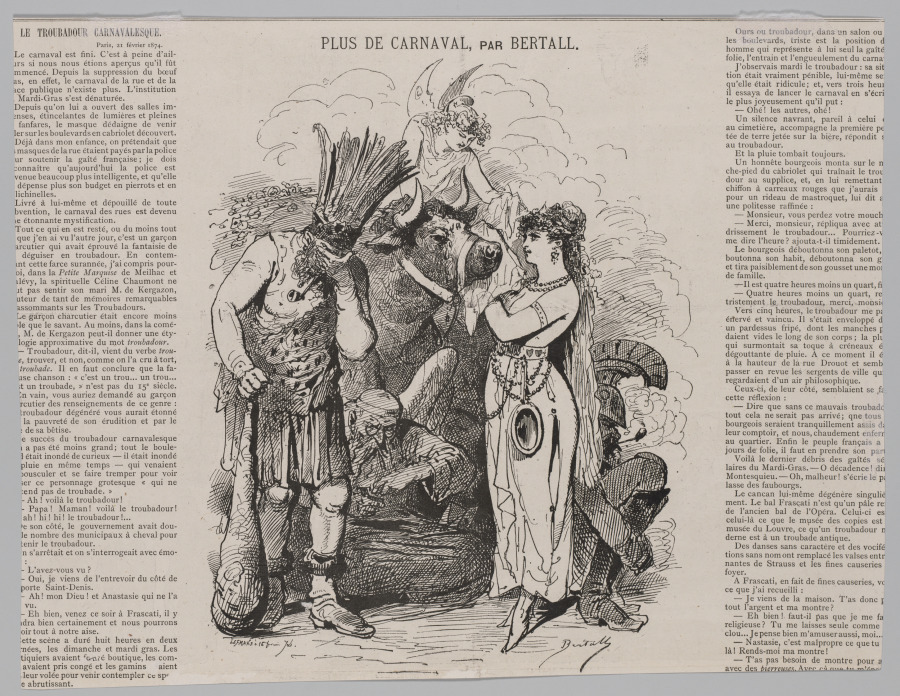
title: At the Café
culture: France, 19th century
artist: Édouard Manet (French, 1832–1883)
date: 1874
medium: gillotage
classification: Print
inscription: signed, in plate, at lower right: Manet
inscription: on recto, at lower left: fragment of an unidentified blind stamp (HN within shield)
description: This print by Édouard Manet depicts the Café Guerbois, a gathering place for Impressionist artists in 19th-century Paris. Although best known for his paintings, the artist was an avid printmaker throughout his entire career. Here, he experimented with gillotage—a new technique at the time—to suggest the quick, sketchy lines of drawing, making the image appear as if it had been created quickly and spontaneously.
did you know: This image appeared in the Belgian journal L’Europe, which was censored by Parisian police. This impression is the only one known to have been saved before the journal was destroyed.